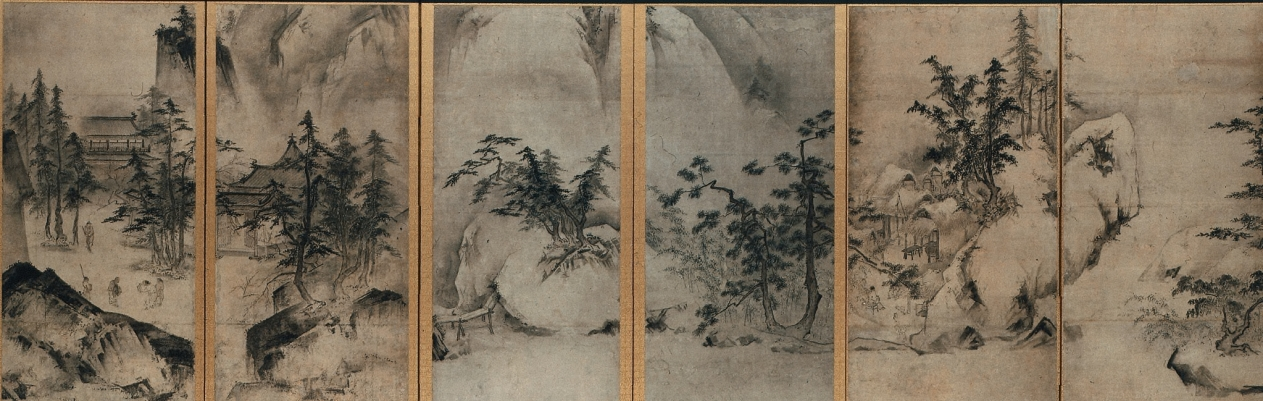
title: Winter and Spring Landscape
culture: Japan, Muromachi period (1392–1573)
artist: attributed to Tenshō Shūbun (Japanese)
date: early to mid-1400s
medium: Six-panel folding screen; ink and slight color on paper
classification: Painting